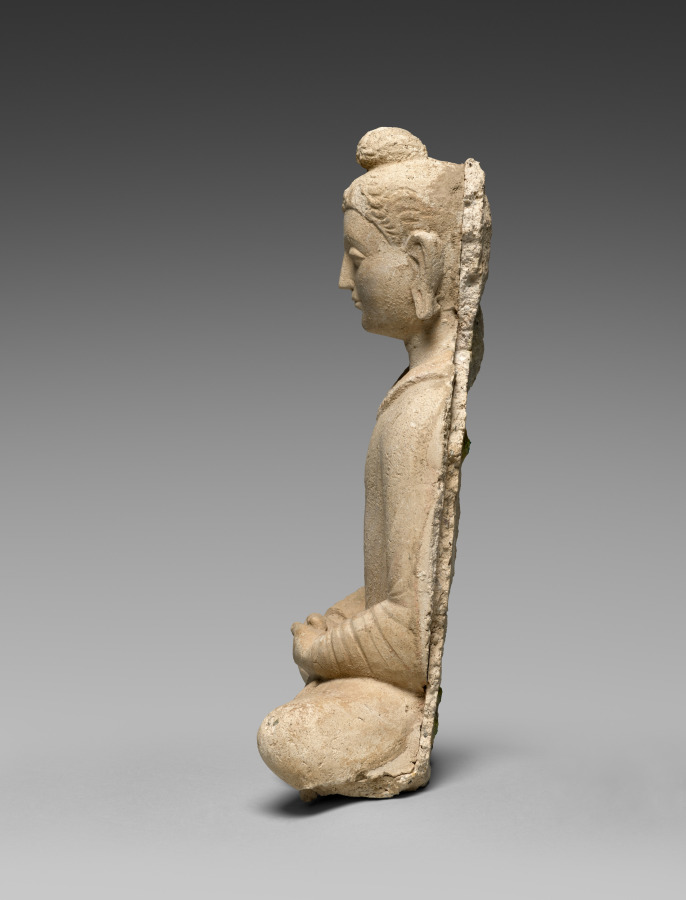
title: Seated Buddha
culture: Afghanistan, Hadda, probably Tape Shotor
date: c. 300 CE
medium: stucco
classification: Sculpture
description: Multiple images of seated Buddhas and related figures surrounded monuments called stupas that enshrined sacred relics. Made of stucco, which is a lime-based plaster material, the backs of the sculptures were fixed to the platform on which the hemispherical stupa was constructed. Visitors would see these images as they venerated the stupas by walking around them reverently, in a clockwise direction. The main stupa at Hadda reportedly contained relics of Shakyamuni Buddha, also known as Siddhartha Gautama, the founder of the Buddhism.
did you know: The way the Buddha holds his hands on his crossed legs indicates that he is shown in meditation.